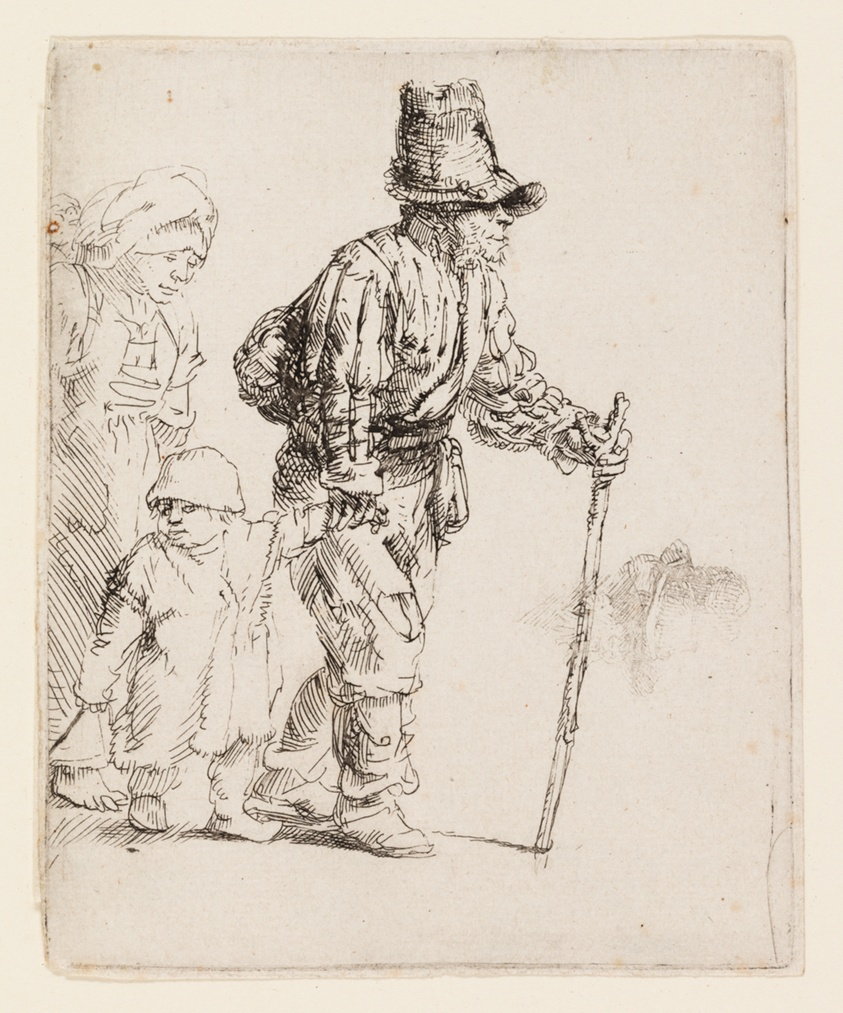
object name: Print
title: Peasant Family on the Tramp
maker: Rembrandt van Rijn (Dutch, 1606-1669)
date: c. 1652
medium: Etching on ivory laid paper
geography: Holland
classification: etching; print; prints and drawing; paper